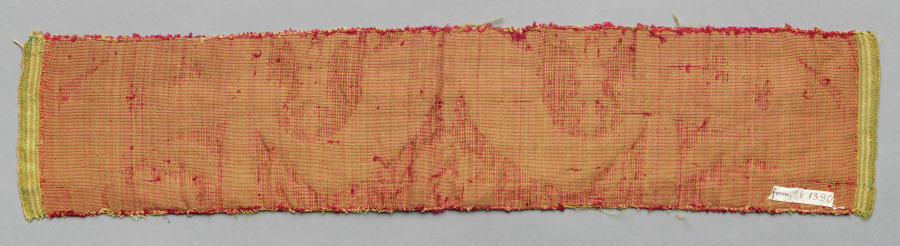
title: Velvet Fragment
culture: Italy, Genoa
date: 1600s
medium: velvet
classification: Velvet